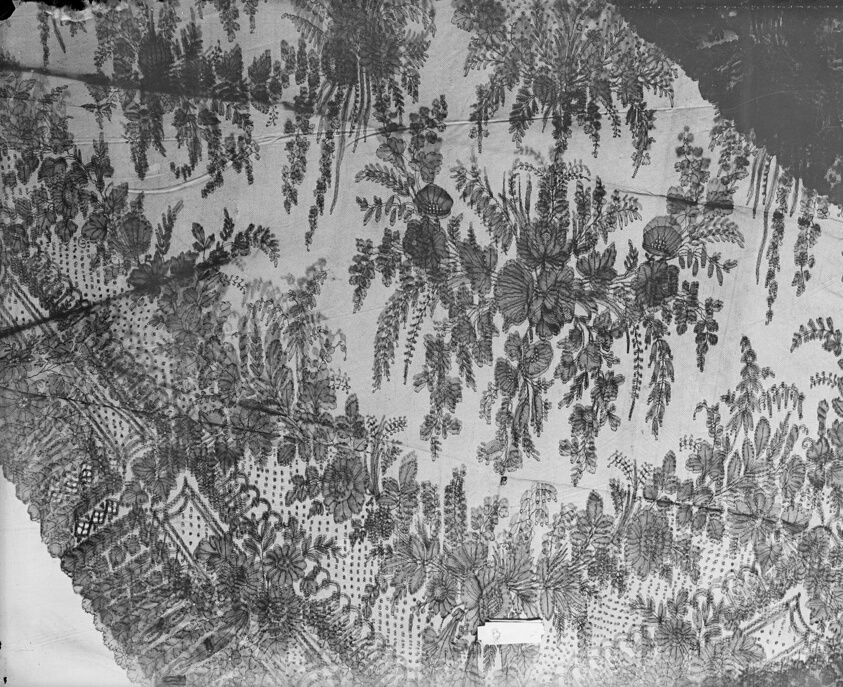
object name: Textile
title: Half Shawl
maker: France, probably Bayeux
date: 1855/65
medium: Silk, bobbin straight lace made in vertical strips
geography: France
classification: textile; lace - bobbin; lace